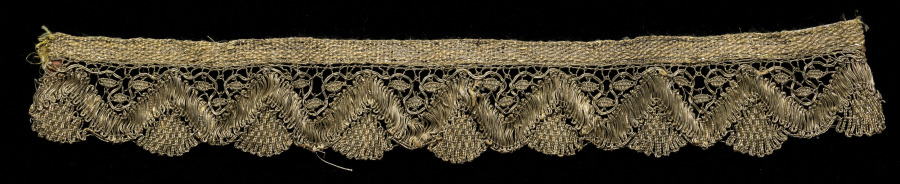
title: Lace Edging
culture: Russia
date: 1800s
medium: Gold metal thread: bobbin lace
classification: Lace